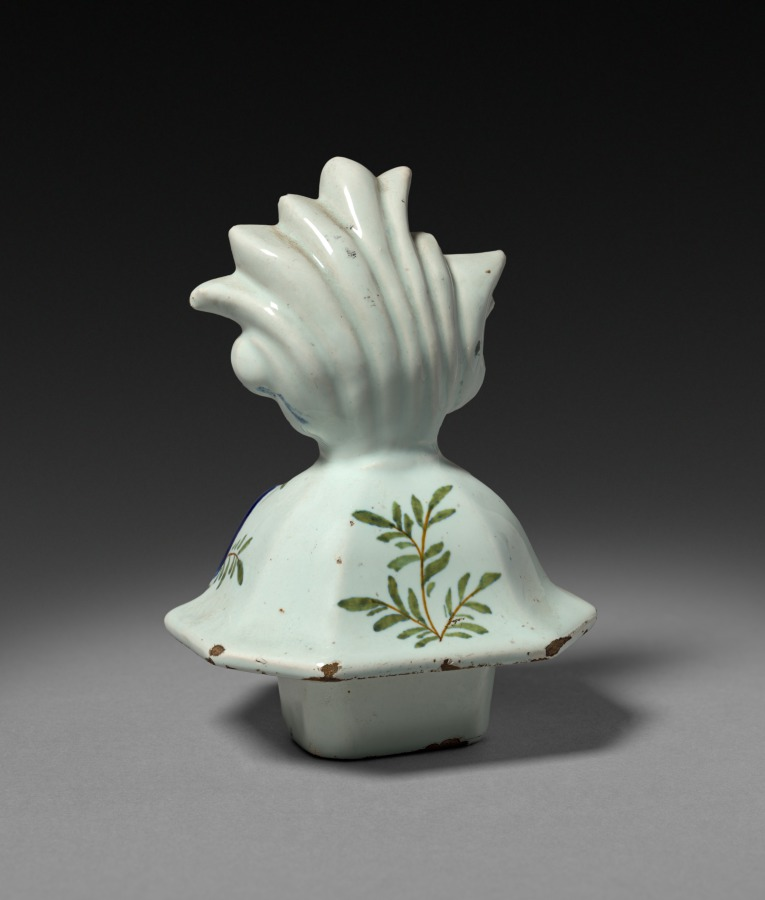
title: Cover for a Vase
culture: Netherlands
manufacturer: probably by Het Bijltje Factory (Dutch)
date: mid-1700s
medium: delftware (tin glazed earthenware)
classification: Ceramic